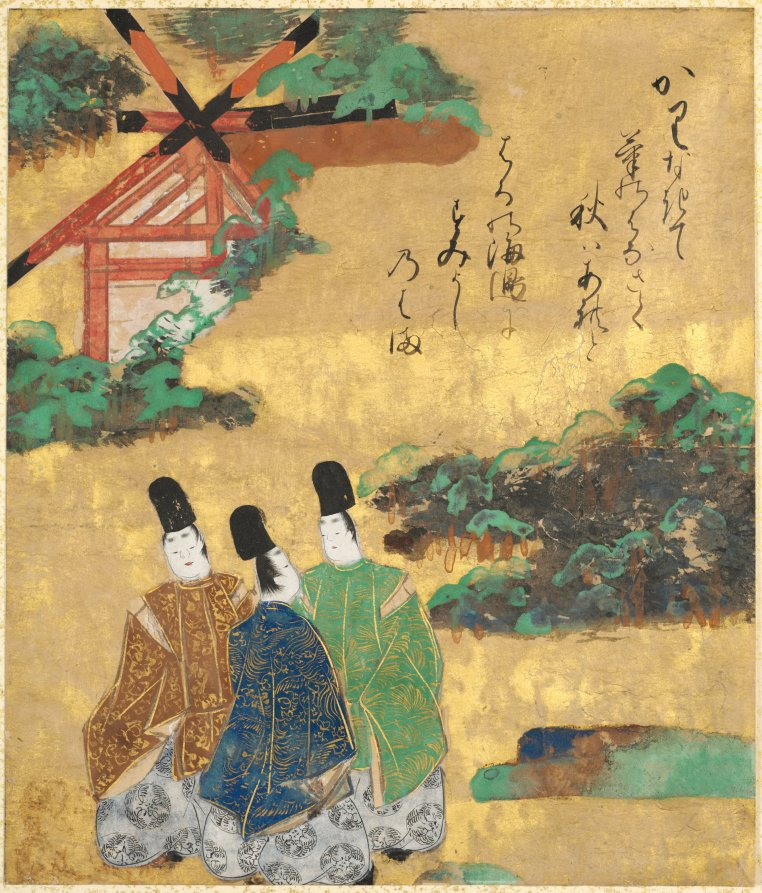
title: The Beach at Sumiyoshi from the Tales of Ise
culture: Japan, Edo period (1615–1868)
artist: Tawaraya Sōtatsu (Japanese, c. 1570–c. 1640)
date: c. 1634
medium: Poetry sheet mounted as an album leaf; ink, color, and gold on paper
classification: Painting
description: The poem written on the painting comes from The Tales of Ise, a 10th-century poetic narrative of love: In autumn the wild geese cry And chrysanthemums are in flower, Yet how pleasant to dwell By the sea in spring On the Beach of Sumiyoshi.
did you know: The red structure at the top of this composition is Sumiyoshi Taisha, the Grand Shrine at Sumiyoshi.